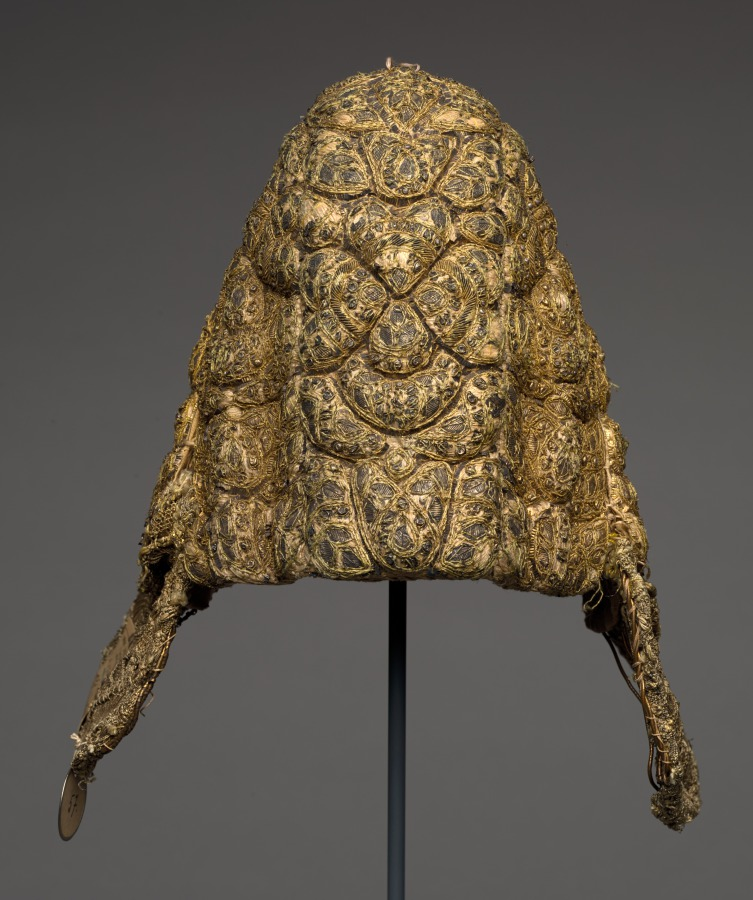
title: Embroidered Peasant Headdress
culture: Germany, Nüremberg, 18th century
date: 1700s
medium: embroidery, gold thread; edged with gold lace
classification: Garment